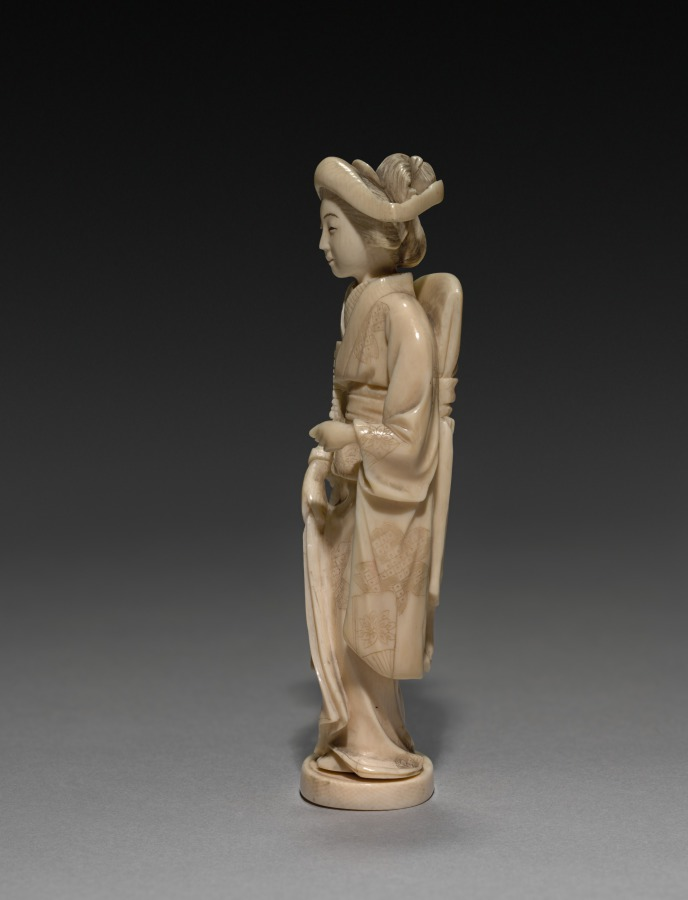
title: Woman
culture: Japan, Meiji period (1868–1912)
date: early 1900s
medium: ivory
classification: Ivory